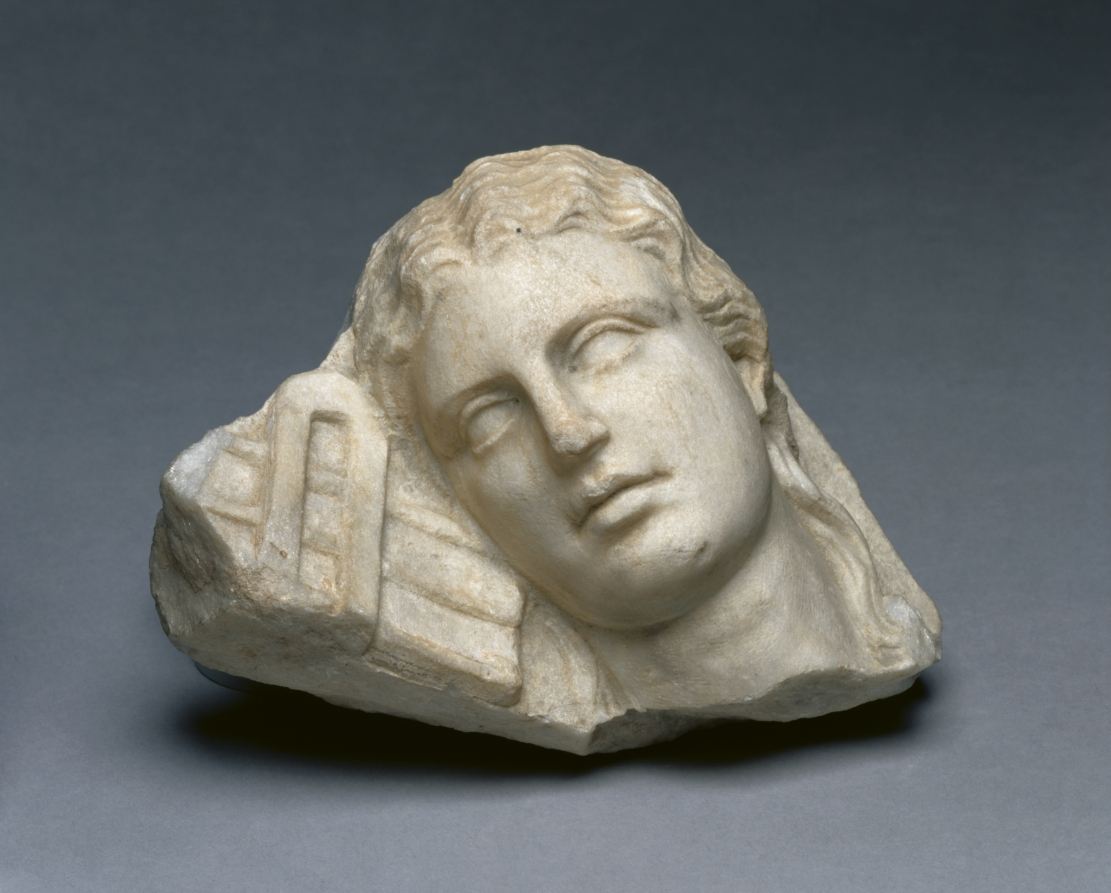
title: Head of a Woman Holding a Sistrum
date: 150 BCE–50 CE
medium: marble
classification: Sculpture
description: This head of a woman was likely originally part of a stele or grave marker. The woman sits in partial profile holding a sistrum close to her head, possibly making music. A sistrum is a type of rattle that originated in ancient Egypt and spread to the Greek world. (View a sistrum in the collection here: 1920.1990.) The sistrum likely signaled to ancient viewers that the woman on the grave marker was a worshiper of the Egyptian goddess Isis, whose cult spread throughout the Mediterranean after Alexander the Great took over Egypt.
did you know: A sistrum (rattle) can have either three or four branches through the body of the instrument.